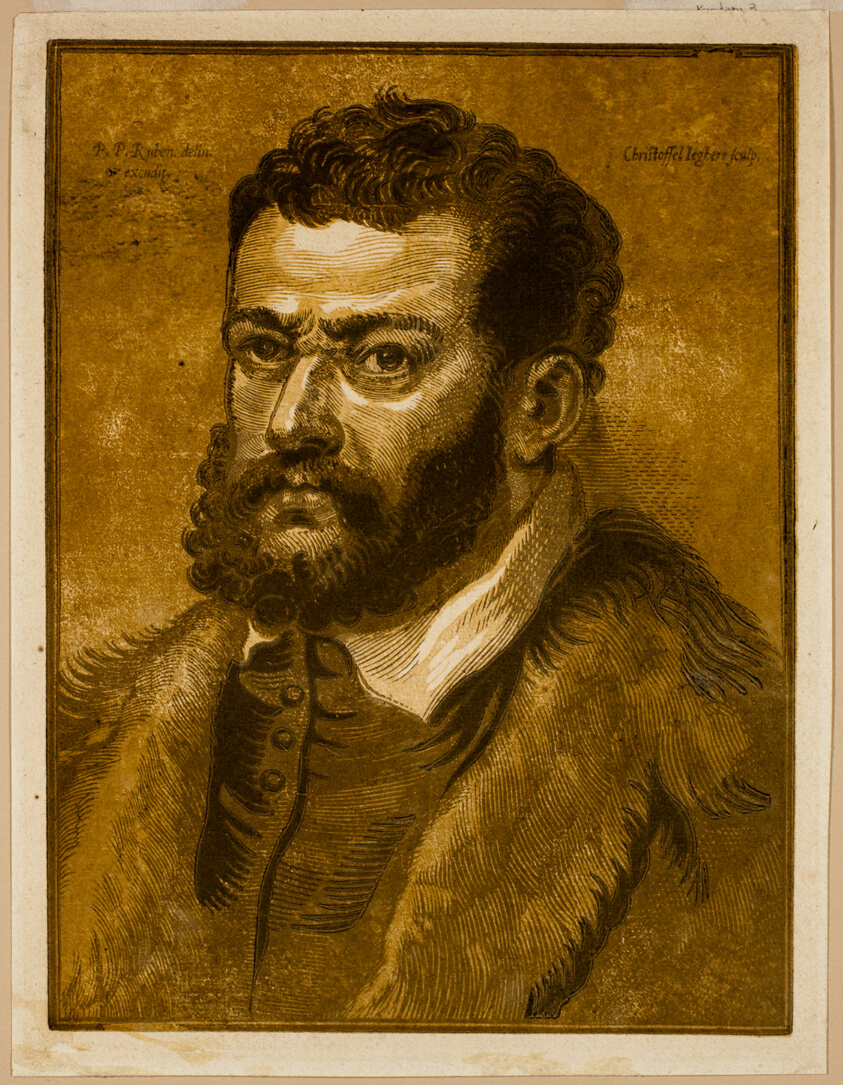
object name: Print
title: Portrait of Doge Giovanni Cornaro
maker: Christoffel Jegher (Flemish, 1596-1652/53); after Peter Paul Rubens (Flemish, 1577-1640)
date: 1632/36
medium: Chiaroscuro woodcut in beige, ochre, and two tones of brown on cream laid paper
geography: Flanders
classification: woodcut; print; prints and drawing